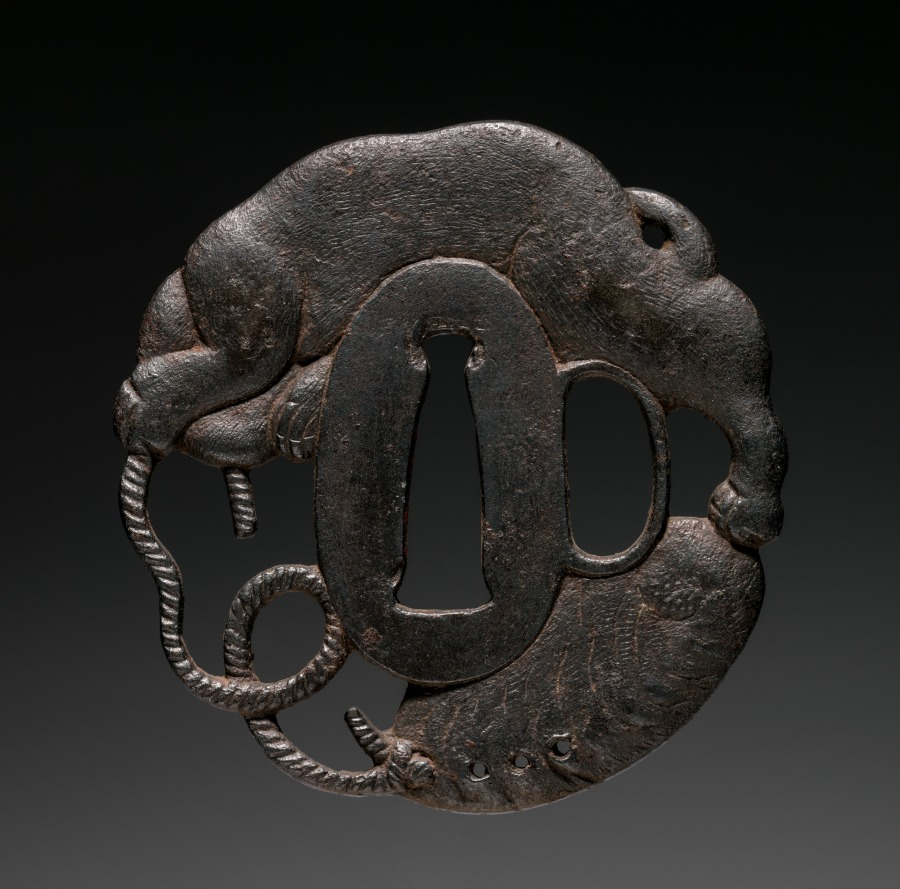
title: Sword Guard (Tsuba) with Puppy Playing with Shell on Cord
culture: Japan, possibly Edo period (1615-1868)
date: c. 1615–1868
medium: iron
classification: Arms and Armor